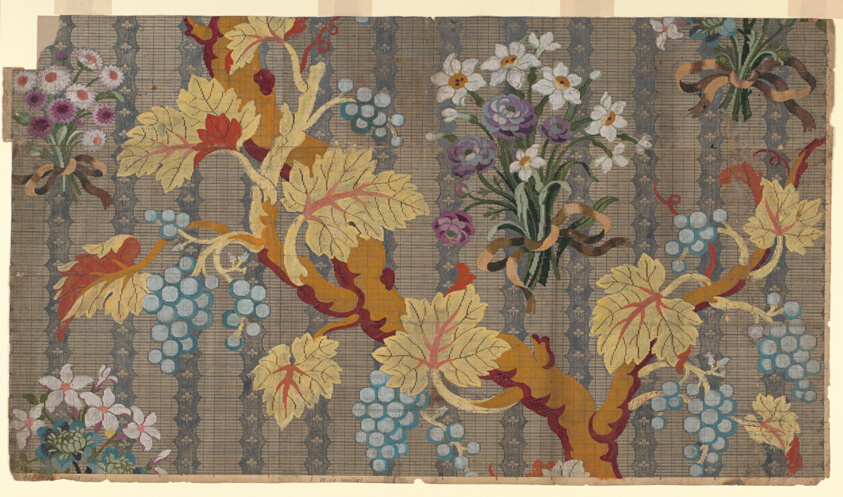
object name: Drawing and Watercolor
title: Mise-en-carte (Point-paper)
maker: Designed by Le Clere L'ainé; France, Lyon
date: 1759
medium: Paint on graph paper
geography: Lyon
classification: textile; accessory - paper design